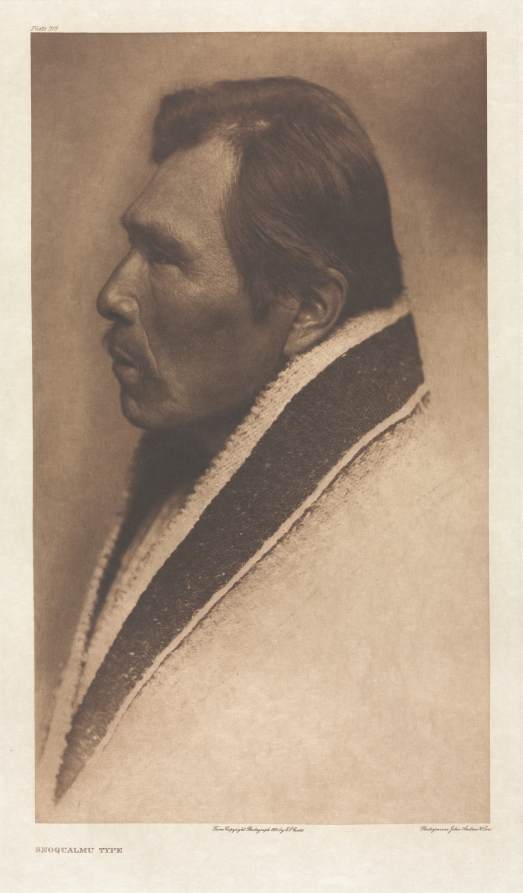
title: Portfolio IX, Plate 319: Snoqualmu Type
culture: America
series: The North American Indian: being a series of Portfolios picturing and describing the Indians of the United States, the Dominion of Canada, and Alaska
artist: Edward S. Curtis (American, 1868–1952)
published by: The University Press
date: 1901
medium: photogravure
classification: Portfolio